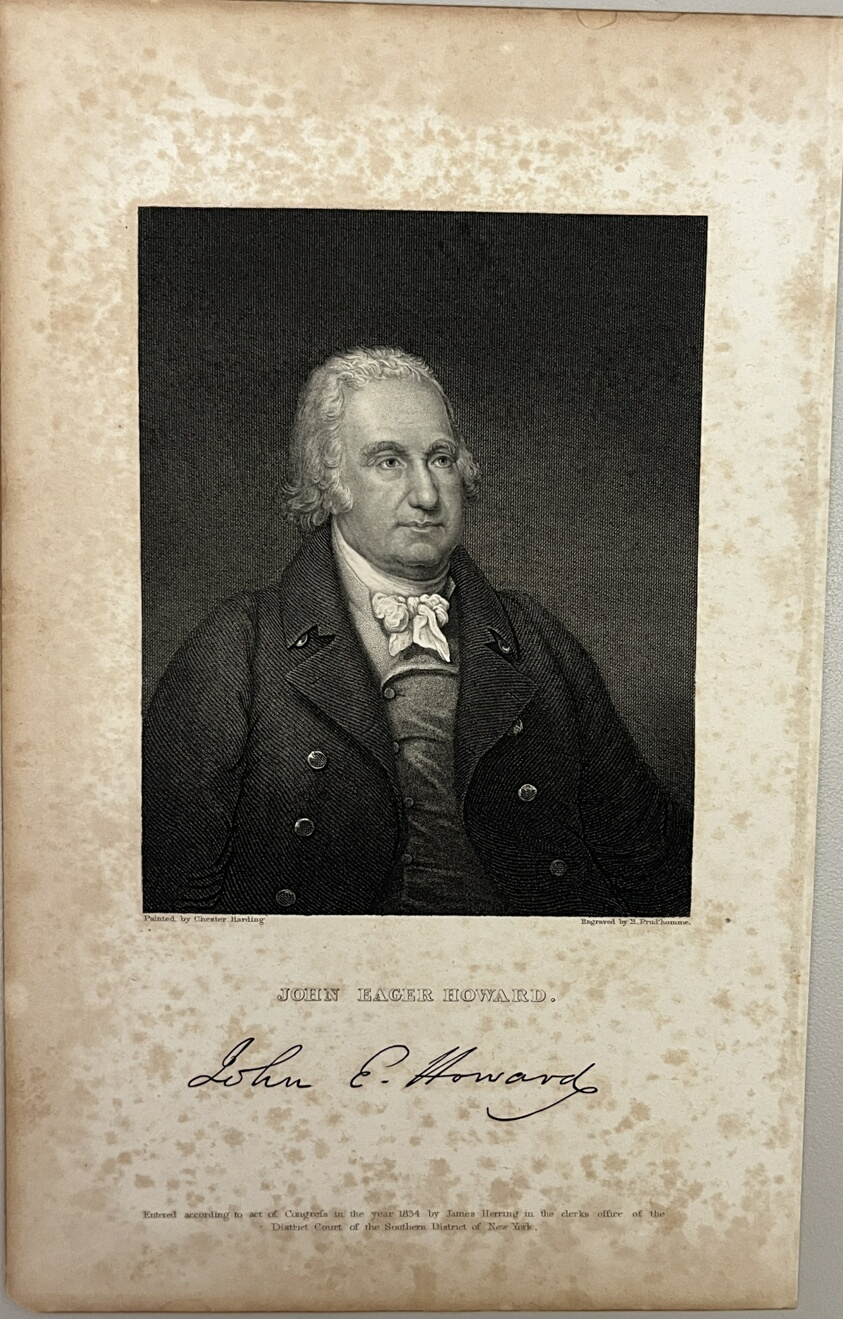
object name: Print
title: John Eager Howard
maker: E. Prud'homme (likely French, 19th century); after Chester Harding (American, 1792-1866)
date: 1834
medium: Stipple engraving on paper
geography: France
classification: reproduction; print; prints and drawing